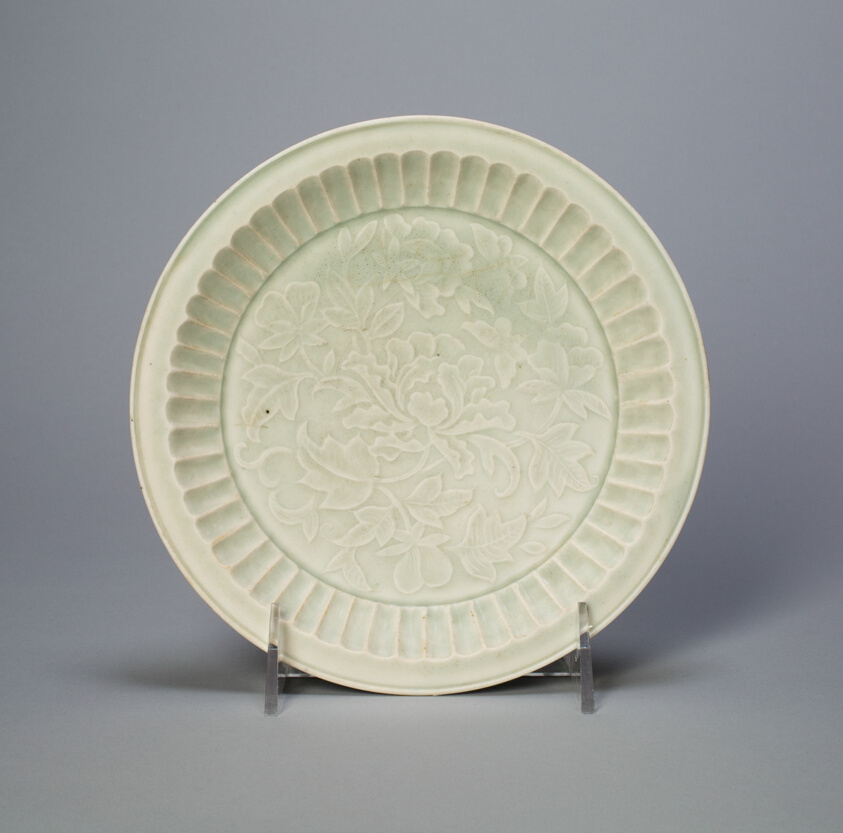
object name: Vessel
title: Dish with Peonies and Leaves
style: Chinese (culture or style)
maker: China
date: Song dynasty (960–1279)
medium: Porcelain with underglaze molded decoration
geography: China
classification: dish (vessel); porcelain; asian art; ceramics; vessel